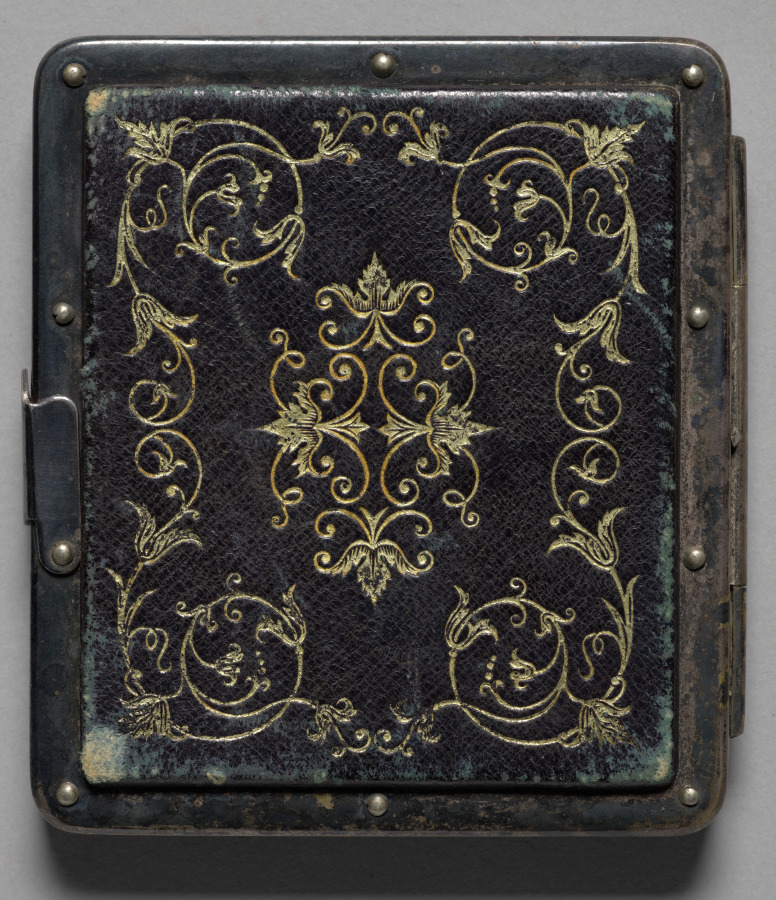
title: Construction of the John Stewart Store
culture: America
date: c. 1856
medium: daguerreotype, sixth plate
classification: Photograph